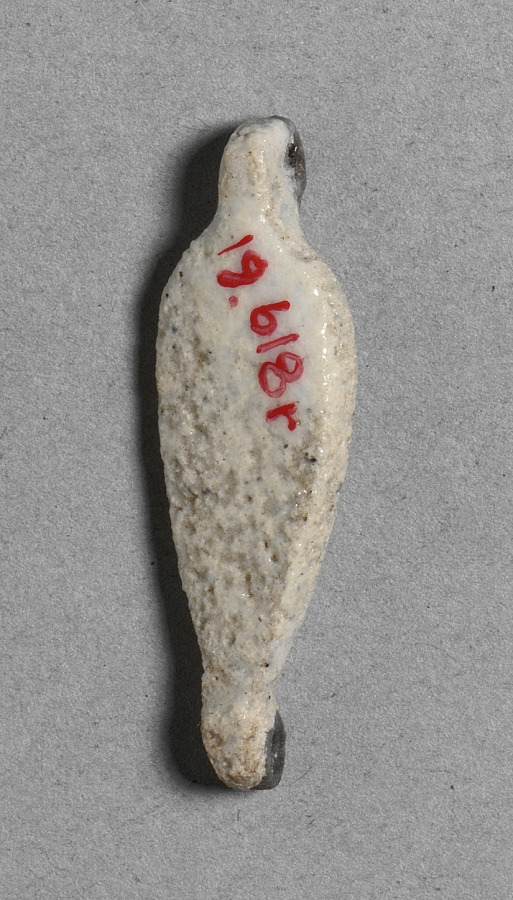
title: Petal-Shaped Bead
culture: Egypt, New Kingdom (1540–1069 BCE), Dynasty 18, reign of Amenhotep III (1390–1352 BCE)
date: c. 1391–1353 BCE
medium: faience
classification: Jewelry